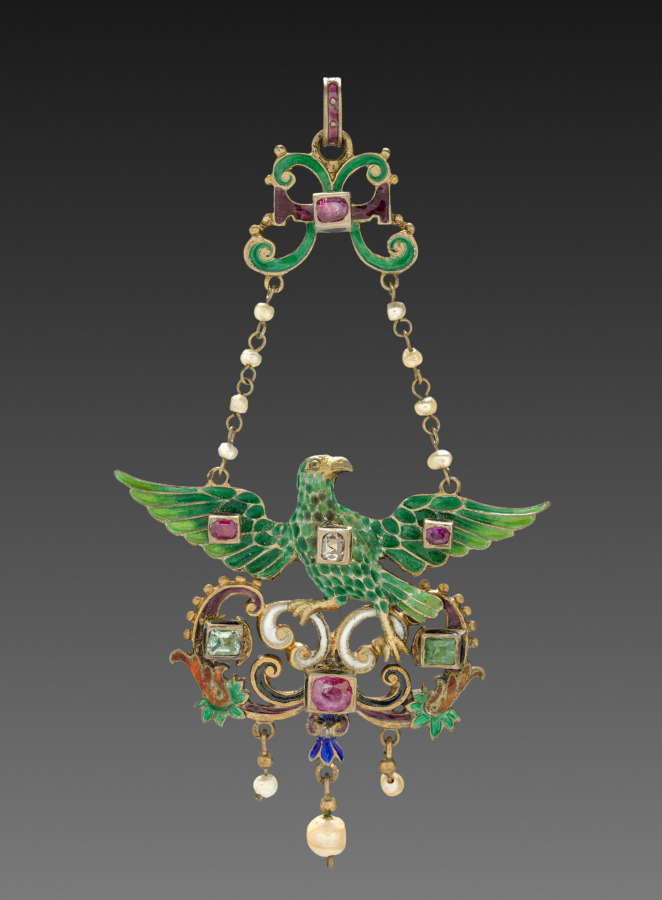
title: Pendant and Chain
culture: Germany, 19th century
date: 1800s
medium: metal and enamel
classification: Jewelry